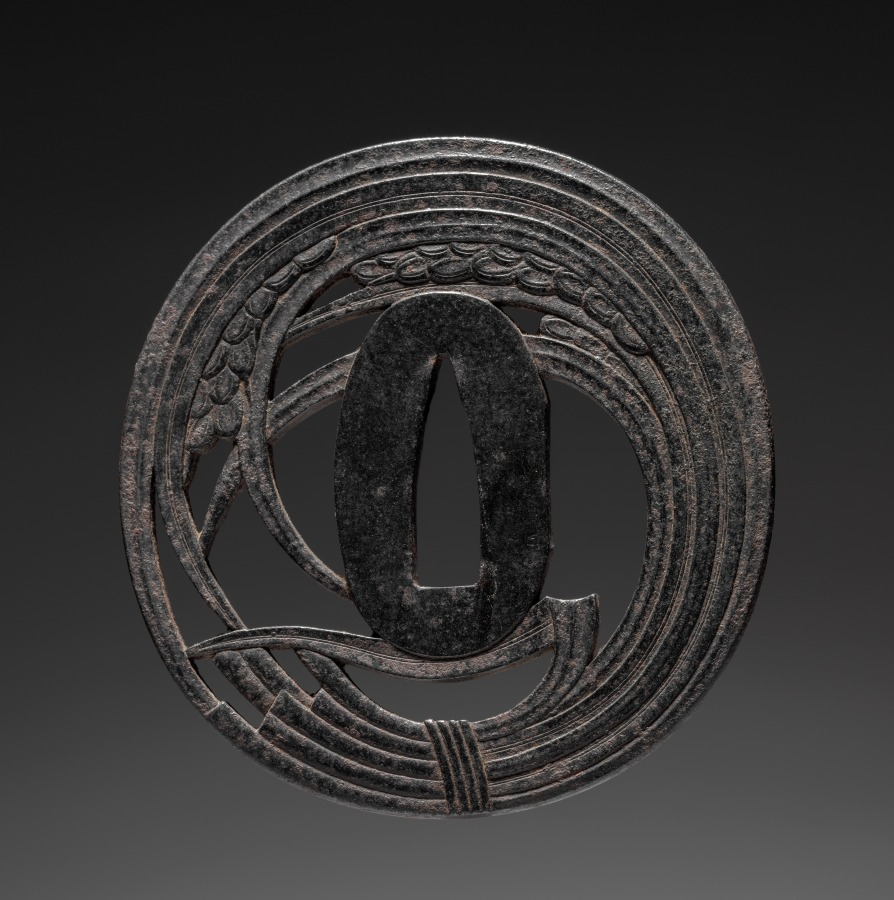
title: Sword Guard (Tsuba) with Sheaf of Rice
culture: Japan, Edo period (1615–1868)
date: early 1800s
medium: iron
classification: Arms and Armor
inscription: Signature: Tatsunaga, residing at Kofu (Edo)